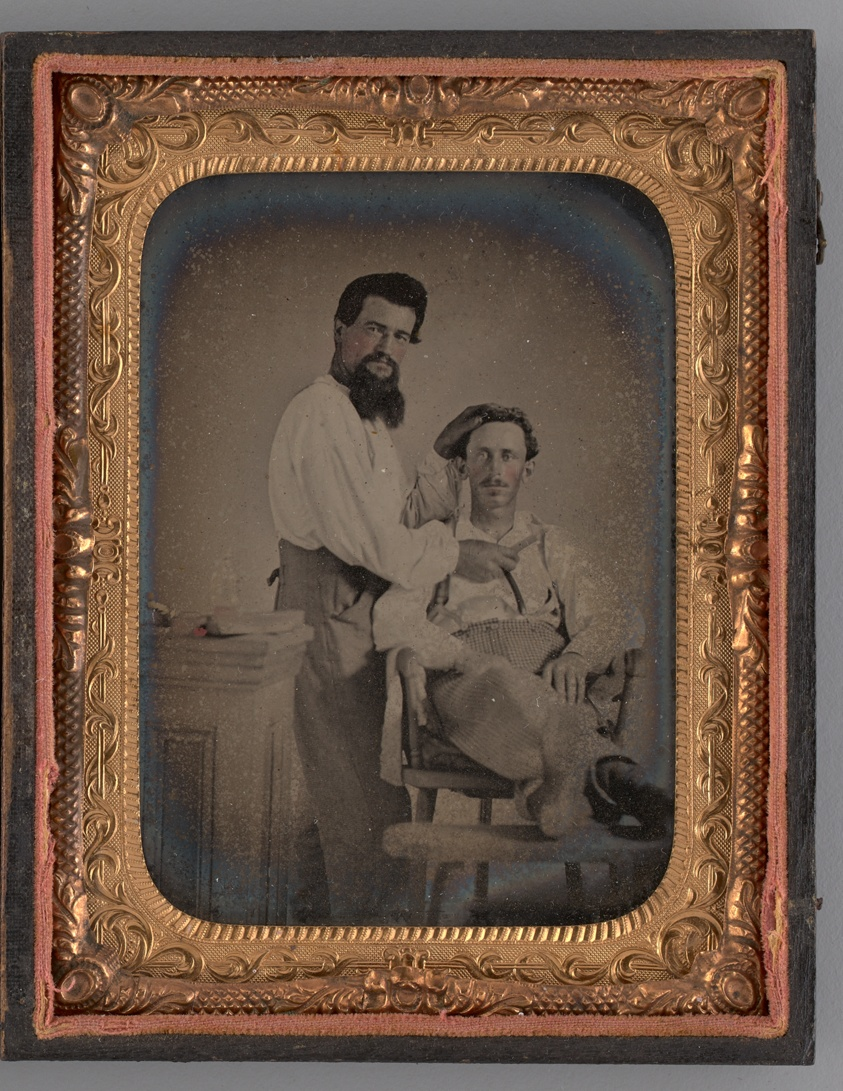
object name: Photograph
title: Untitled (Portrait of Two Men; a Barber and Client)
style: 19th century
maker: Unknown maker; American, 19th century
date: 1863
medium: Tintype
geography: United States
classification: portrait; tintype; portrait; photograph; photographic process; photography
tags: lundberg collection, barbershops, portraits, portraits: male subject, portraits: multiple subjects